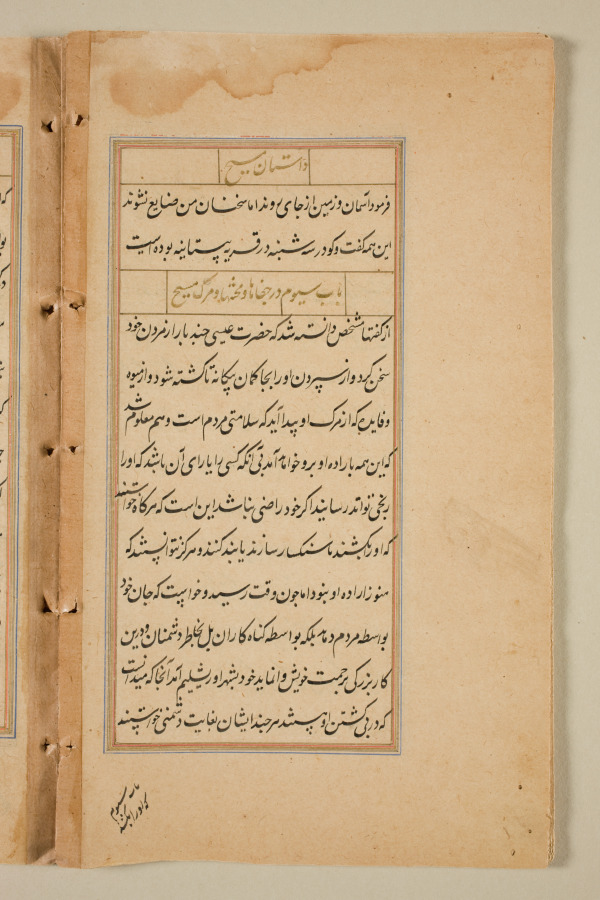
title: Text page from a Mirror of Holiness (Mir’at al-quds) of Father Jerome Xavier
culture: Mughal India, Allahabad, made for Prince Salim (1569–1627)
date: 1602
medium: Ink and gold on paper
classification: Manuscript